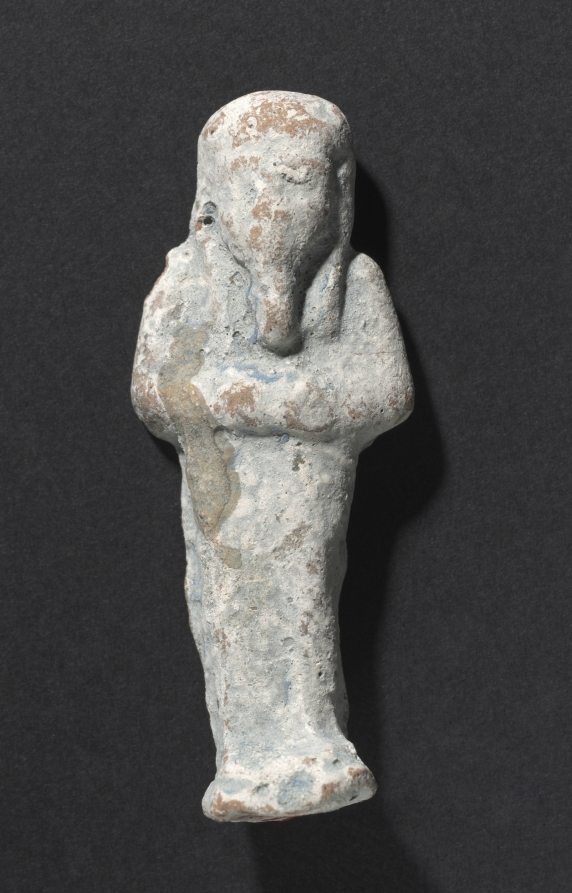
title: Shawabty of Ditamenpaankh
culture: Egypt, Late period (715–332 BCE), Dynasty 25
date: 715–656 BCE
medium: terracotta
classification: Funerary Equipment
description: High demand for shawabtys in the Late Period, a time when as many as 400 or more shawabtys were placed in the tomb with the deceased, gave rise to a specialized container for storing them: the shawabty box. This example is inscribed for the lady of the house, Ditamenpaankh, and was probably one of a pair originally made for her. The single-masted boat on the box's lid is perhaps an allusion to the pilgrimage of the deceased to the holy city of Abydos, the cult city of Osiris, king of the dead. The shawabtys inside are crude, mass-produced examples cast in an open mold. Made of terracotta, their blue paint imitates more costly shawabtys made of faience. As for the shawabty spell, it has been removed from its traditional location on the shawabty's front and relocated onto the sides of box, where it needed only to be written once, thus expediting production.